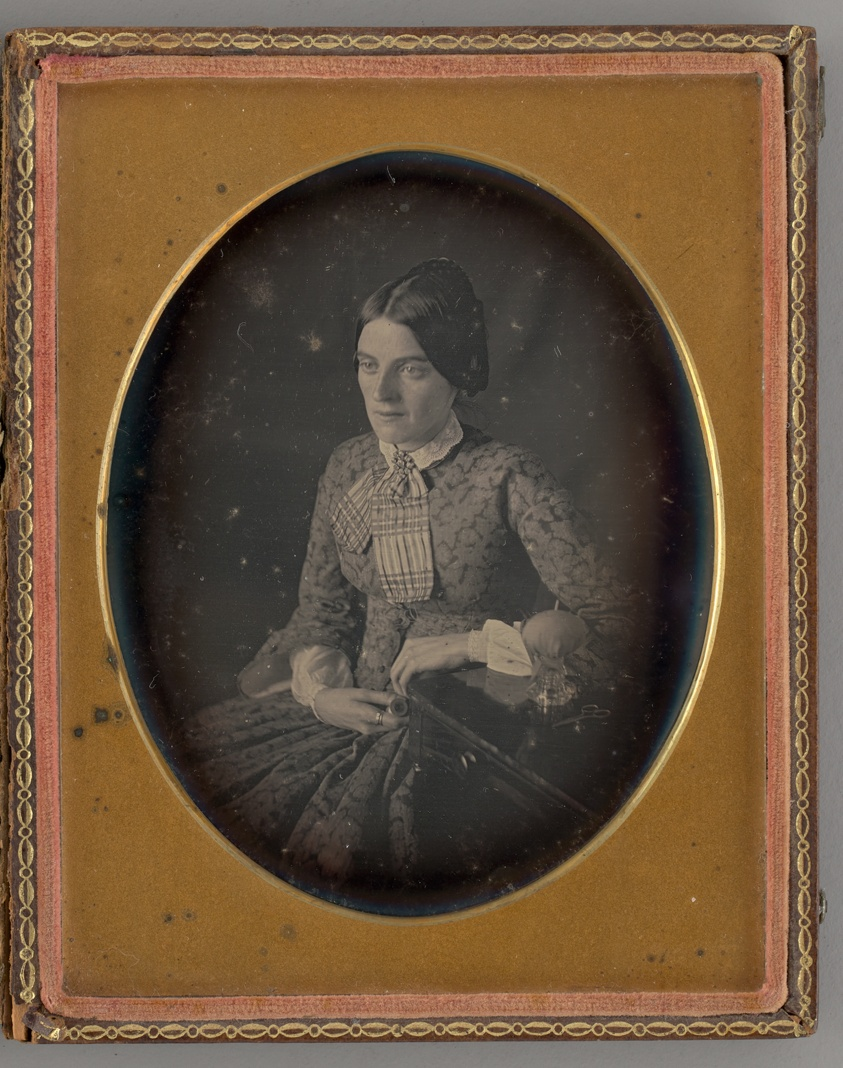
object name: Photograph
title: Untitled (Portrait of a Seated Woman)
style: 19th century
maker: Unknown maker; American, 19th century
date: 1850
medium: Daguerreotype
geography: United States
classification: portrait; photography; photographic process; photograph; daguerreotype; portrait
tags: lundberg collection, portrait, portraits, portraits: female subject, female, woman